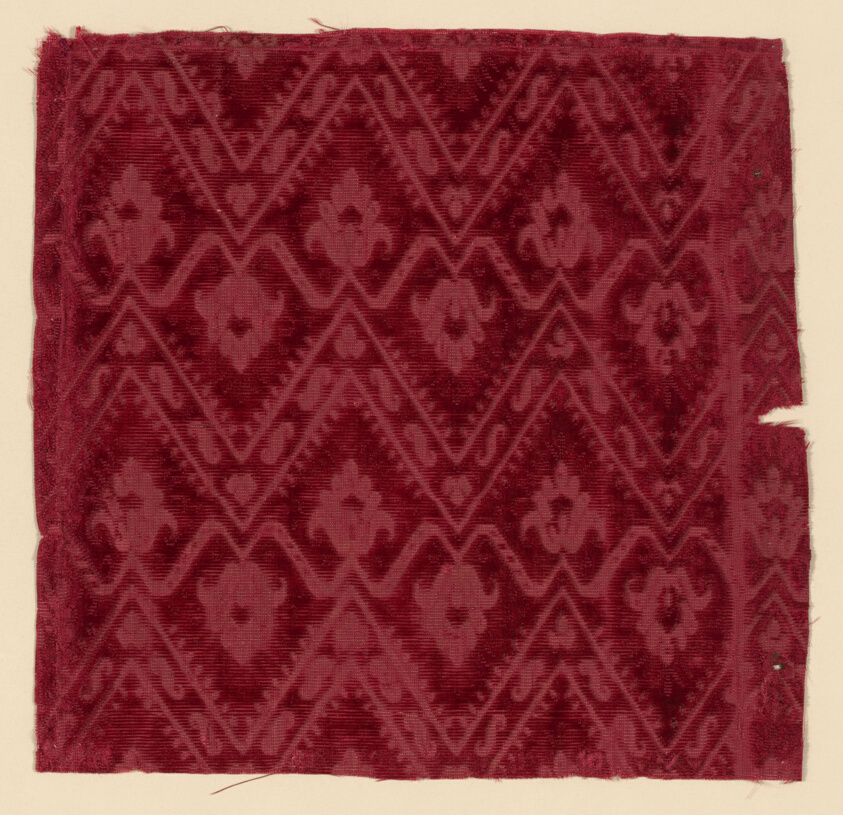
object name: Textile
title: Fragment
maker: Italy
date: 17th century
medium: Silk, cut, uncut, voided velvet against plain weave foundation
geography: Italy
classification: textile; weaving - velvet